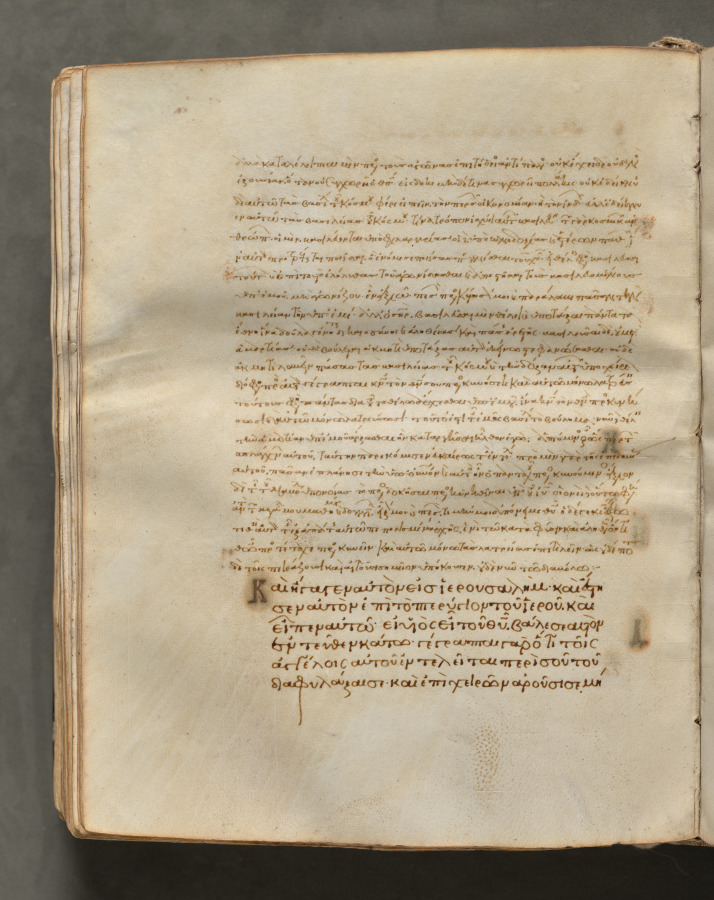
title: Text, folio 218 (verso), from a Gospel Book with Commentaries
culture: Byzantium, Constantinople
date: c. 1000–1100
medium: ink, tempera, and gold on vellum; leather binding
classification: Bound Volume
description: Each of the four gospels in this book opens on a page with brilliantly illuminated borders depicting the author of the text as well as birds-principally peacocks, symbols of the immortality of the soul-and fountains, representing the fountain of life and the salvation of the soul. This volume consists of 428 leaves with texts in Greek. Its level of sophistication suggests that it was probably written and decorated in a monastery in Constantinople.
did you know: Gospel Books were carried in procession through Byzantine churches.